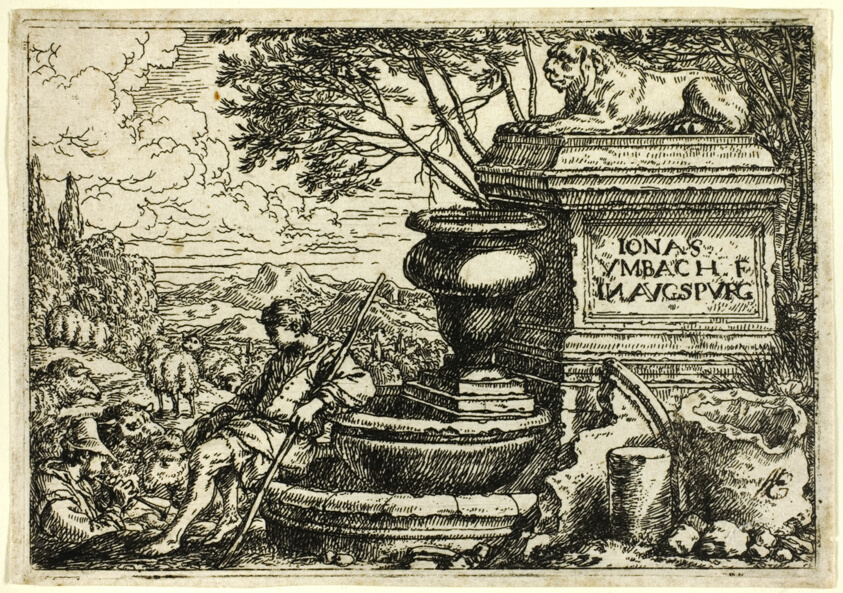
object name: Print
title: Italian Landscape with Ruins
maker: Jonas Umbach the Elder; German, 1624-1693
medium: Etching in black on ivory laid paper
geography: Germany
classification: etching; print; prints and drawing